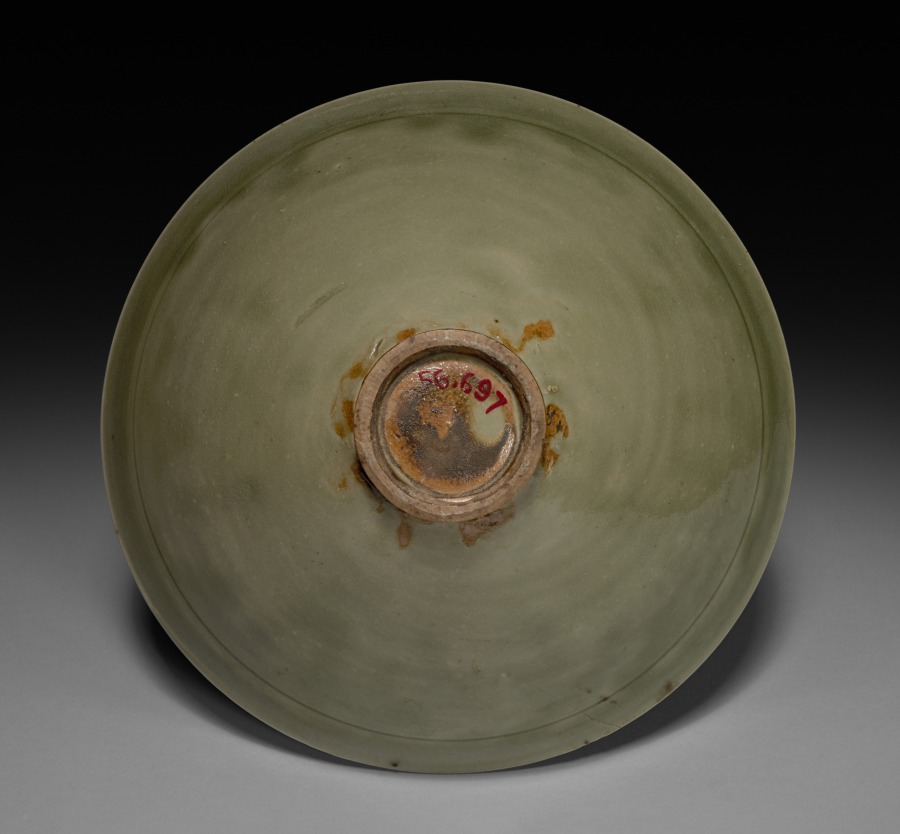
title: Bowl: Northern Celadon Ware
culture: China, Shaanxi or Henan province, Northern Song dynasty (960-1127)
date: 12th Century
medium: glazed stoneware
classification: Ceramic